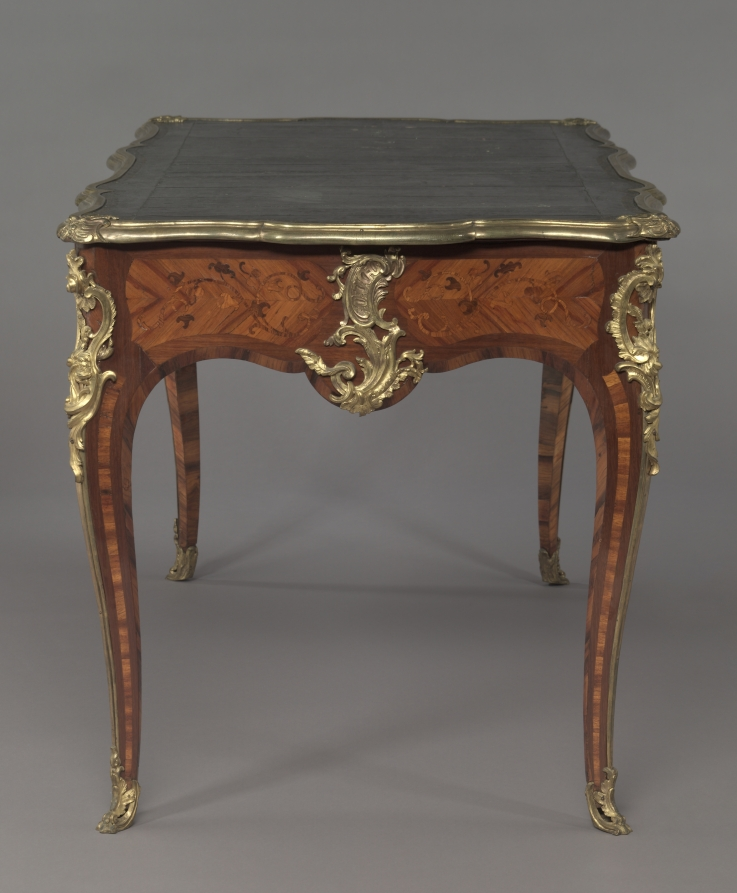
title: Table Desk (Bureau Plat)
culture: France, 18th century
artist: Bernard II van Riesen Burgh (Dutch, 1766)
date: c. 1750– 1760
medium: wood marquetry with gilt bronze mounts, leather top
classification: Furniture and woodwork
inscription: signed three times on bottom edge of apron: B. V. R. B.